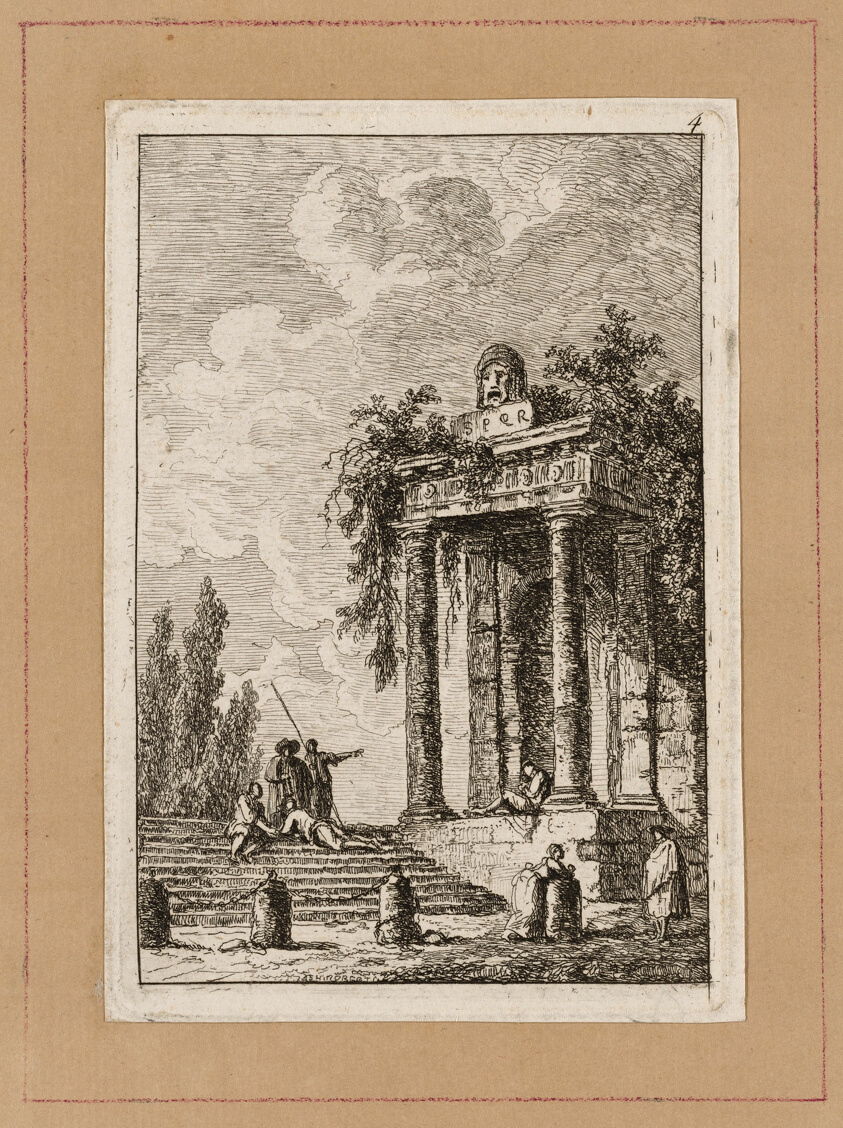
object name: Print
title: Plate Four from Evenings in Rome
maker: Hubert Robert (French, 1733–1808)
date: 1763/64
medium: Etching in black on off-white laid paper, tipped onto tan laid paper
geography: France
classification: etching; paper; print; prints and drawing